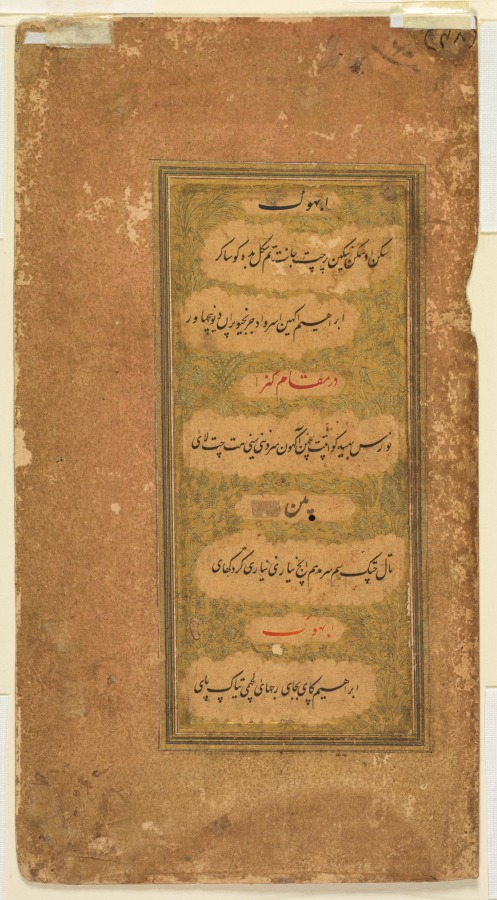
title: From Dohras (Songs) 40 and 42 from the Kitab-i Nauras (Book of Nine Essences) of Sultan Ibrahim Adil Shah II of Bijapur (r. 1580–1627) (recto)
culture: India, Bijapur, Deccan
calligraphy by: Khalilullah Butshikan (Persian, active in India 1596–c. 1620)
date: 1618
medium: ink with two-tone gold on paper, double-sided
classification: Painting